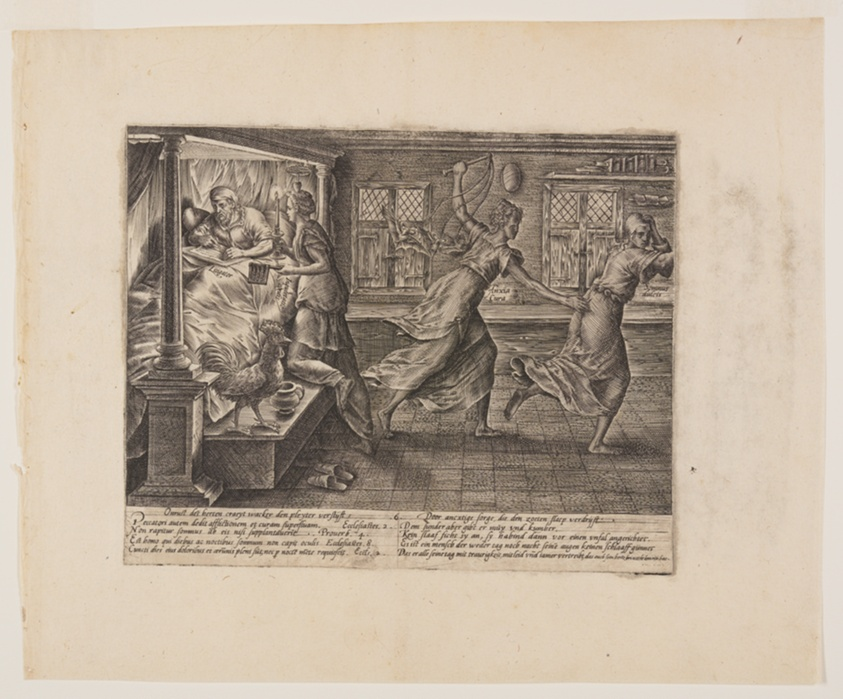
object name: Print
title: The Sleepless Night of the Litigant, from Litis Abusus (The Abuses of the Law)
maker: Hendrick Goltzius (Dutch, 1558–1617)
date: c. 1576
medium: Engraving on ivory laid paper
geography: Netherlands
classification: print; paper; prints and drawing; engraving